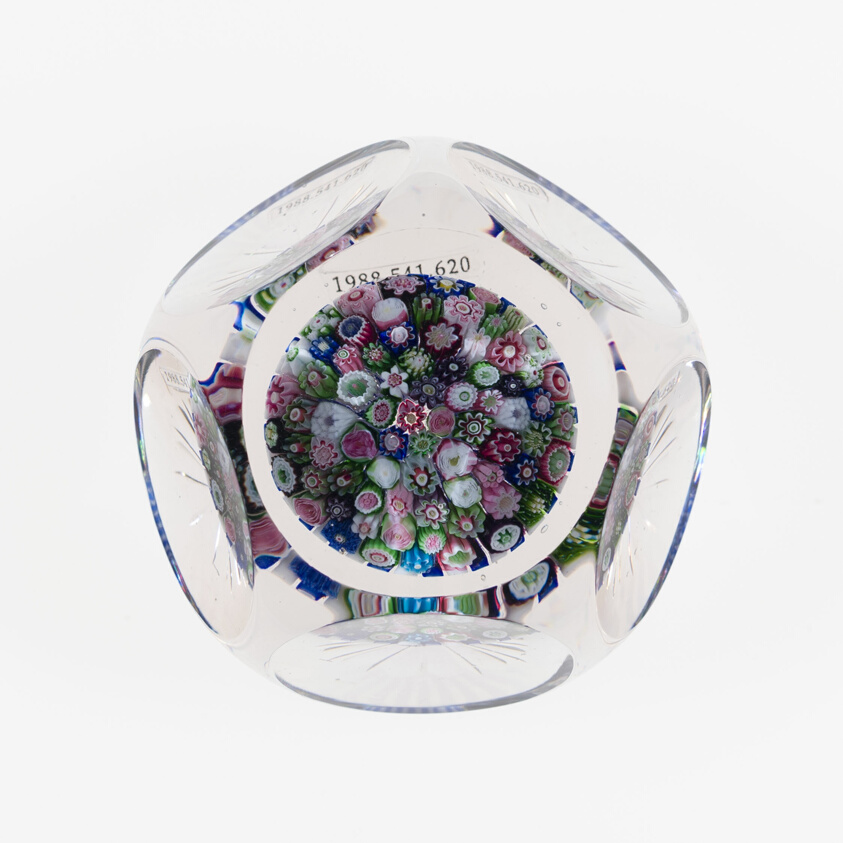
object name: Glass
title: Paperweight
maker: Clichy Glassworks (Cristalleries de Clichy); Clichy, France, 1837-1885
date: c. 1845–60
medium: Glass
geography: Clichy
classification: paperweight; glass